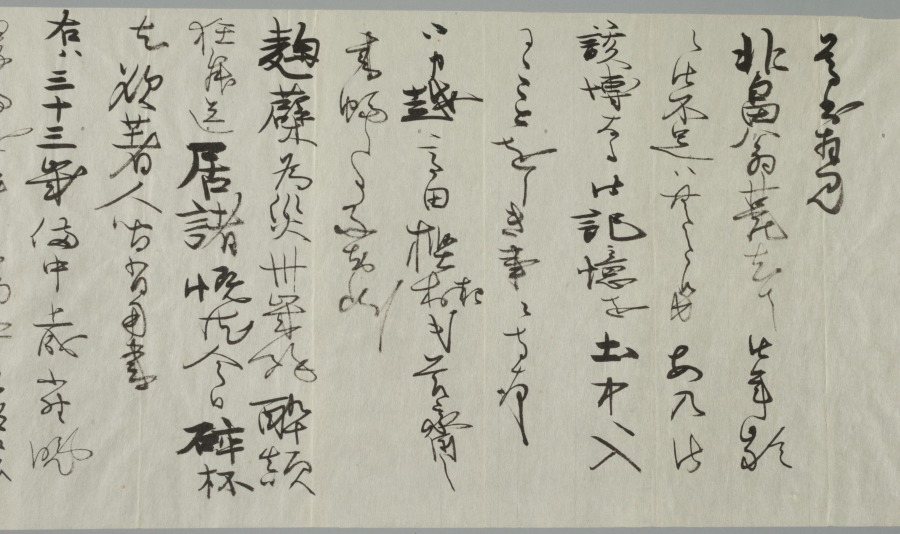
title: Courtesan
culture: Japan, Edo period (1615–1868)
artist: Matsuno Chikanobu (Japanese, active 1716–35)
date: 1716–35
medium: hanging scroll; ink and color on paper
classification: Painting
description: A glamorous courtesan sports an outer robe decorated with large roundels featuring plant motifs including iris and bush clover. Little is known about the life and artistic training of the painter Matsuno Chikanobu, an ukiyo-e artist who painted in a style strongly reminiscent of that of the Kaigetsudō studio. Many of his known paintings are on silk, and executed with high quality pigments, indicating that his primary clientele were wealthy individuals.